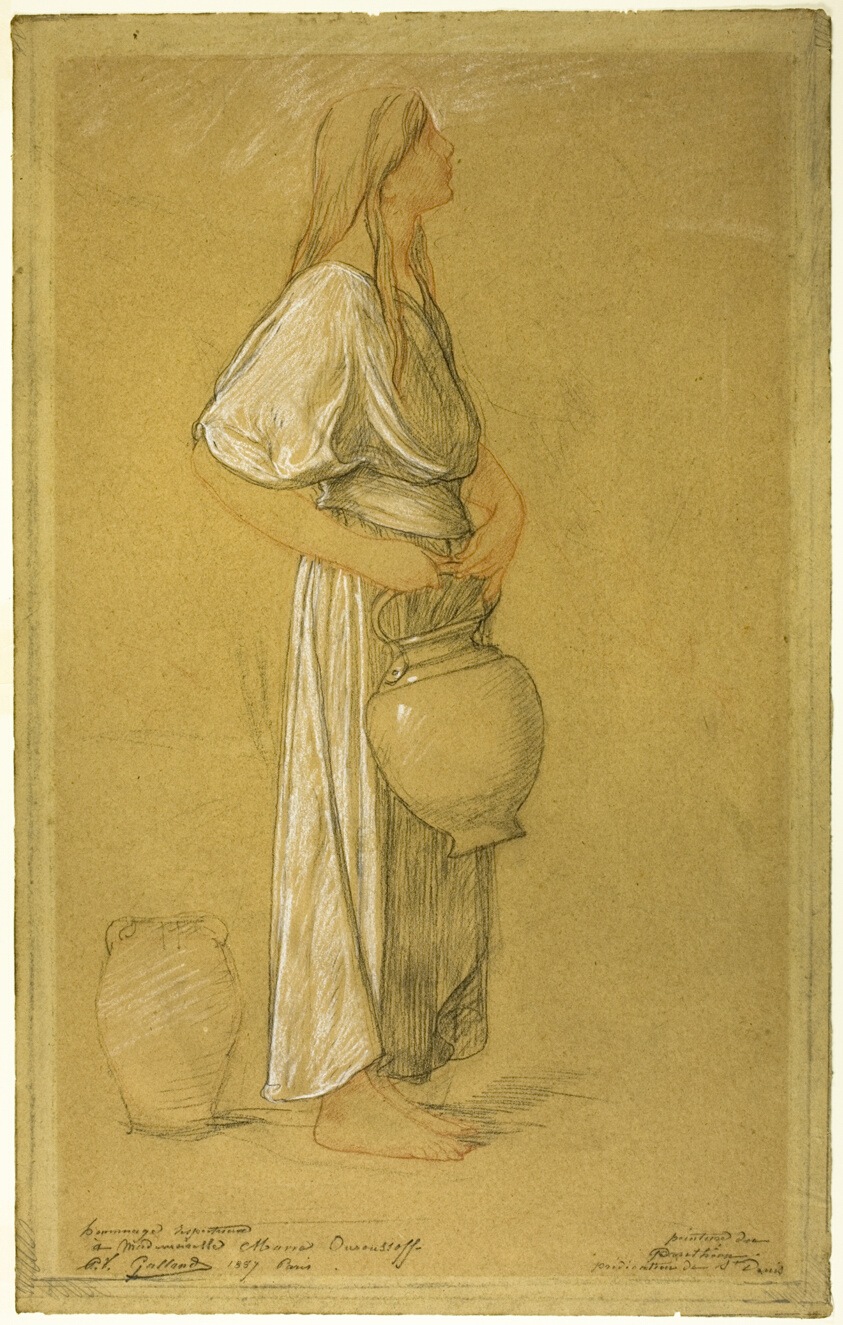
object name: Drawing and Watercolor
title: Study: Woman with a Jar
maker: Pierre Victor Galland (Swiss, 1822-1892)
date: 1887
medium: Black and red chalk, heightened with white chalk, on tan wove paper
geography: Switzerland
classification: chalk; drawings (visual works); prints and drawing